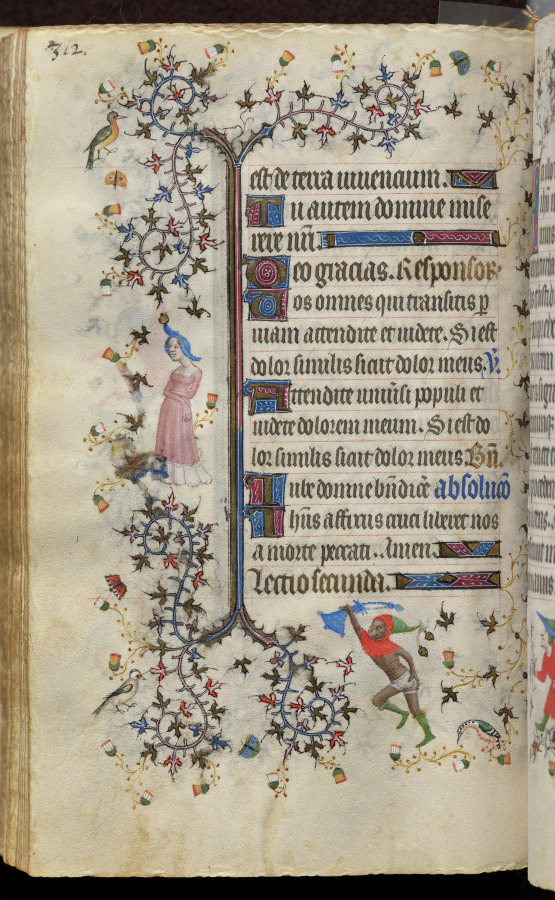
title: Hours of Charles the Noble, King of Navarre (1361-1425): fol. 156v, Text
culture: France, Paris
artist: Master of the Brussels Initials and Associates (French)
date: c. 1405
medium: ink, tempera, and gold on vellum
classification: Bound Volume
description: This precious volume was obviously highly prized by its owner, the French-born King of Navarre, who had his coat of arms painted on no less than twenty folios. Rather than directly commissioning this manuscript from a specific workshop, it seems that Charles the Noble acquired his book of hours -- perhaps ready-made for the luxury market -- while on a trip to Paris in 1404-05. A collaborative effort, six painting styles are evidenced within the pages of this codex, those of two Italians, two Frenchmen, and two Netherlanders. The painter who was responsible for the planning and decoration of the book, and who produced seventeen of the large miniatures, was a Bolognese artist known as the Master of the Brussels Initials. His principal assistant, responsible for most of the borders, was a Florentine who signed his name "Zecho" da Firenze on folio 208 verso.